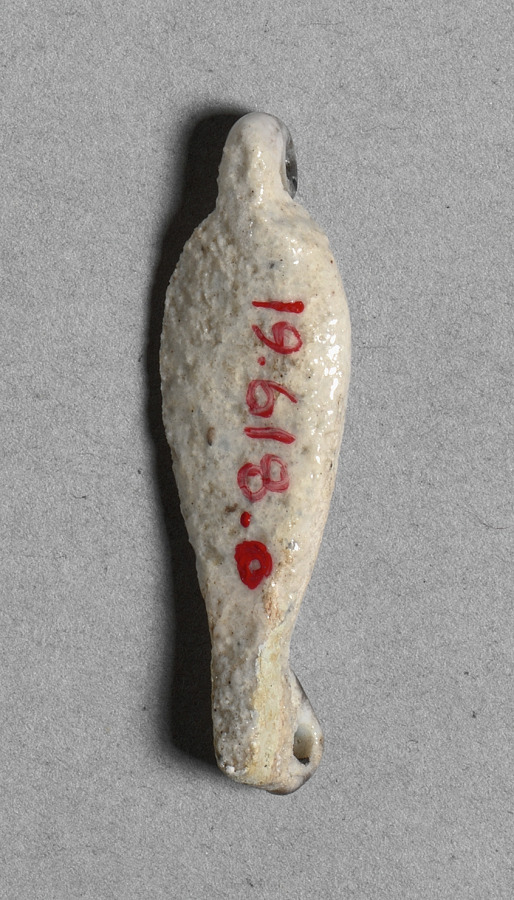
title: Petal-Shaped Bead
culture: Egypt, New Kingdom (1540–1069 BCE), Dynasty 18, reign of Amenhotep III (1390–1352 BCE)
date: c. 1391–1353 BCE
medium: faience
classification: Jewelry